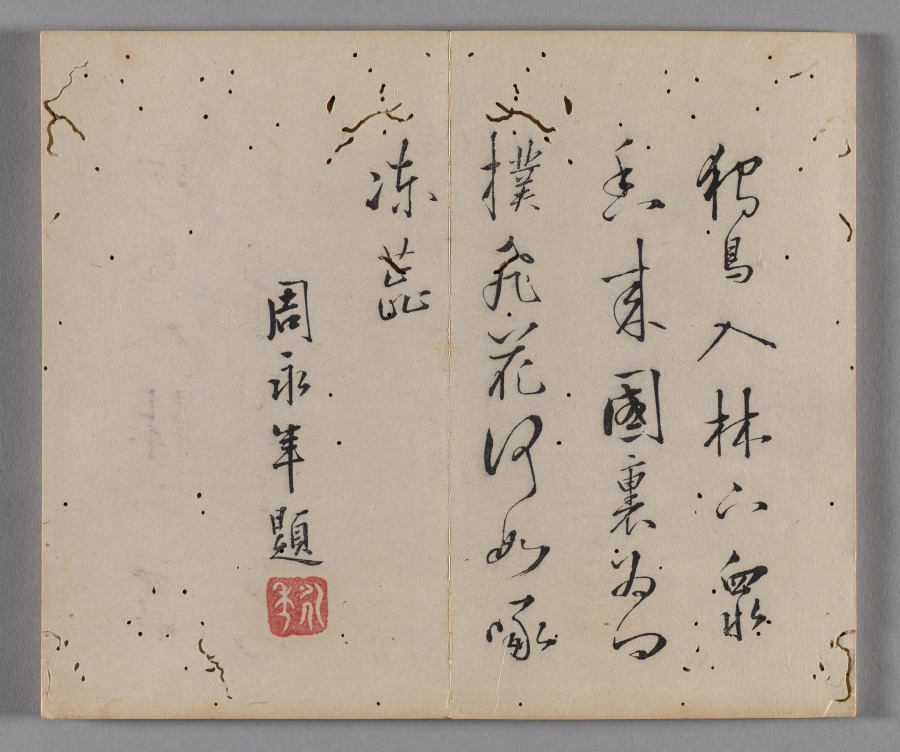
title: Ten Bamboo Studio Painting and Calligraphy Handbook (Shizhuzhai shuhua pu): Birds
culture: China, Qing dynasty (1644-1911)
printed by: Hu Zhengyan (Chinese, c. 1584–1674)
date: 1633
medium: Woodblock-printed book; ink and colors on paper; first edition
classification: Print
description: Color printing reached a level of perfection in the early 1600s, as seen in this Ten Bamboo Studio Collection of Calligraphy and Painting and the Mustard Seed Garden Manual of Painting (printed 1679 and 1701). The painterly quality, precision in registering (aligning) the woodblocks, and harmonious colors made them the most successful color print editions in Chinese history. Both editions were printed and compiled in Nanjing, spread nationwide, and had a great impact on the arts in Japan and Korea.